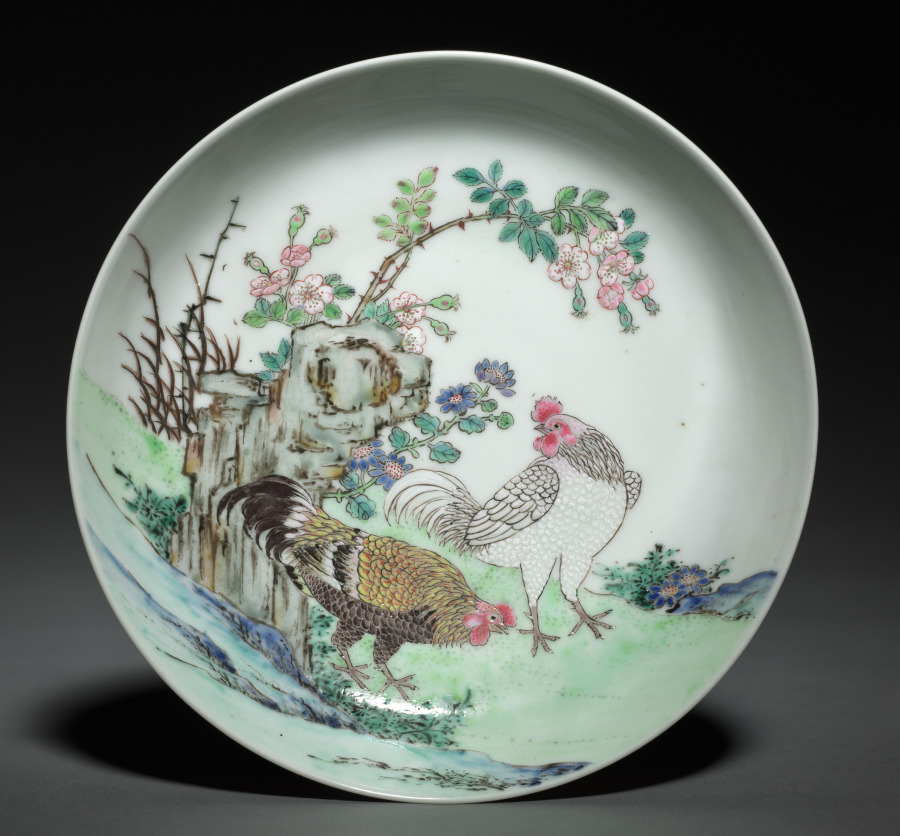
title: Dish with Two Cocks in Landscape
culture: China, Jiangxi province, Jingdezhen kilns, Qing dynasty (1644-1911), Yongzheng mark and reign (1723-35)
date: 1723–35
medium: porcelain with famille rose overglaze enamel decoration (interior) and ruby monochrome enamel decoration (exterior)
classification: Ceramic